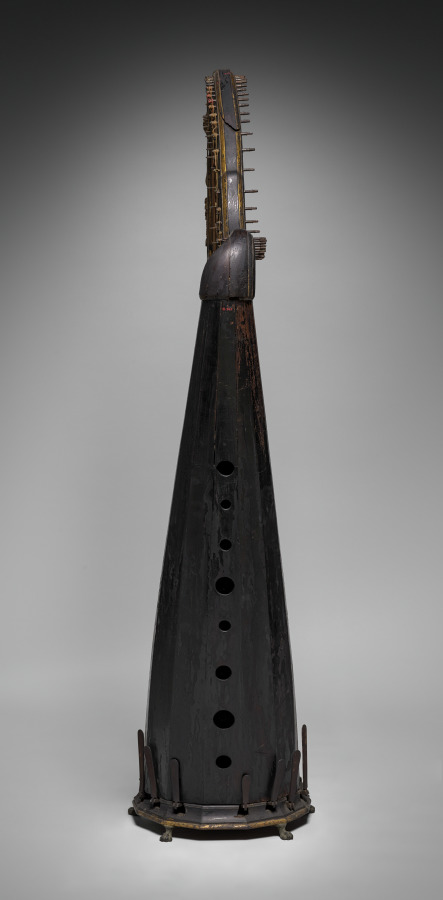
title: Harp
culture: France, 18th century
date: 1700s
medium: wood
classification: Musical Instrument